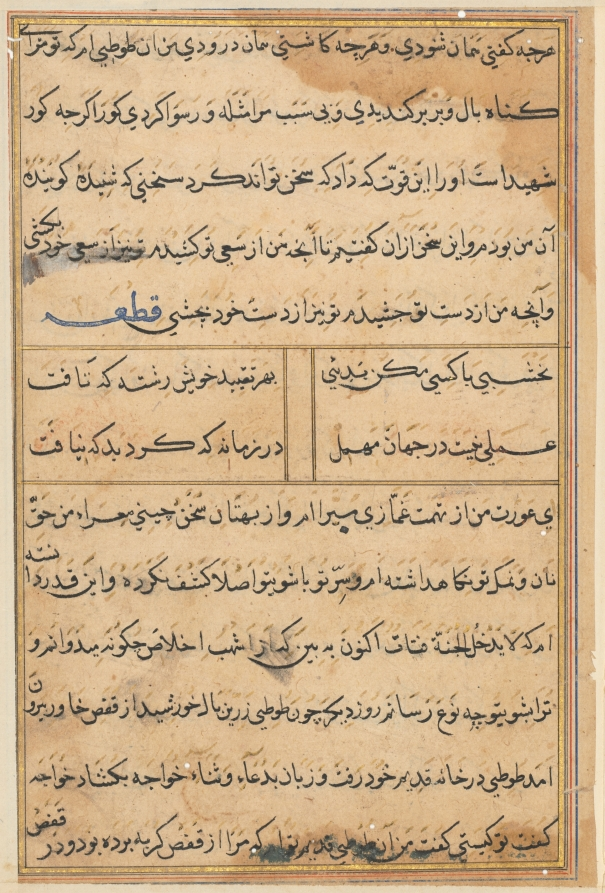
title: Page from Tales of a Parrot (Tuti-nama): text page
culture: Mughal India, court of Akbar (reigned 1556–1605)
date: c. 1560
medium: gum tempera, ink, and gold on paper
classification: Painting